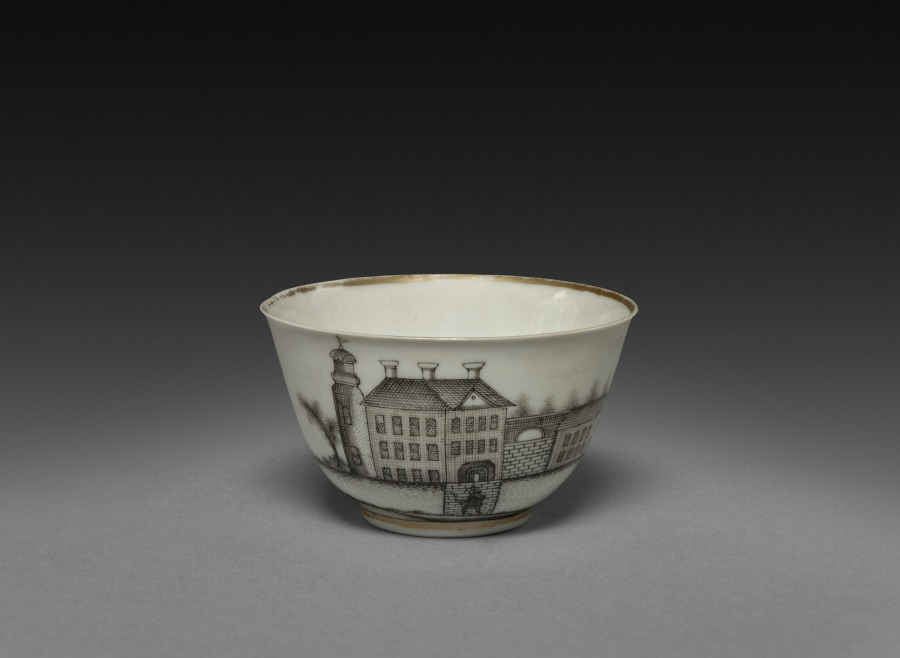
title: Tea Bowl with View of Town (Cleves?)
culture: China, Chinese Export -- Continental Market, 18th century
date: c. 1770–1785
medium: porcelain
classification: Ceramic